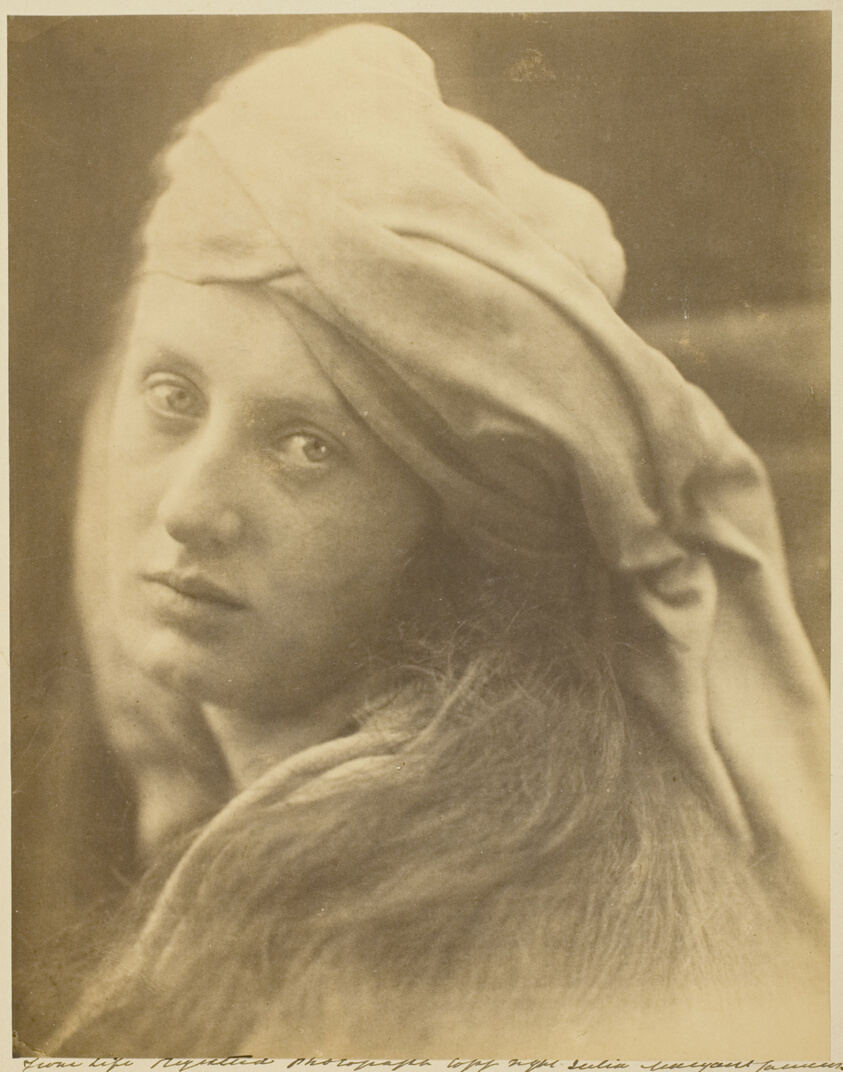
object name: Photograph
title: A Study of the Beatrice Cenci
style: 19th century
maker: Julia Margaret Cameron (English, 1815–1879)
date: September 1870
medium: Albumen print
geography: England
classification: albumen silver print; photographic process; photography; photograph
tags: Collected by Hugh Edwards